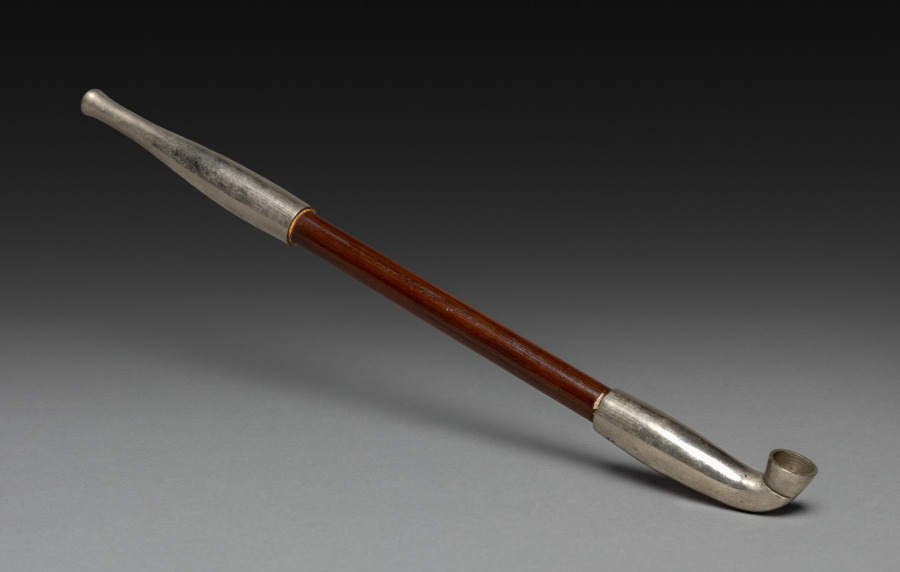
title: Tobacco Pipe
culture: Japan, Edo period (1615–1868) to Meiji period (1868–1912)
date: 1800s–early 1900s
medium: bamboo and metal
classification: Miscellaneous